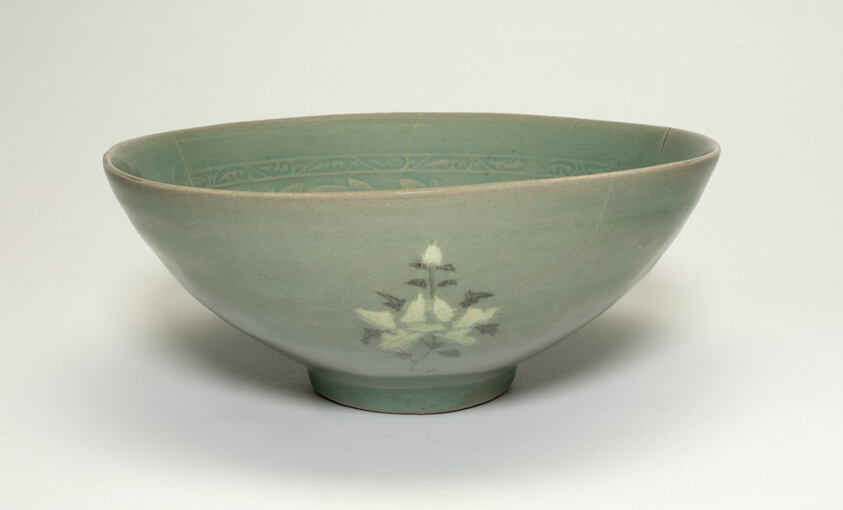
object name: Decorative Arts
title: Bowl with Stylized Peonies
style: Korean (culture or style)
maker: Korea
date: Goryeo dynasty (918–1392), 12th century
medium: Celadon-glazed stoneware with underglaze carved and inlaid decoration of black and white clays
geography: Korea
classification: bowl; dish (vessel); asian art; ceramics; decorative arts